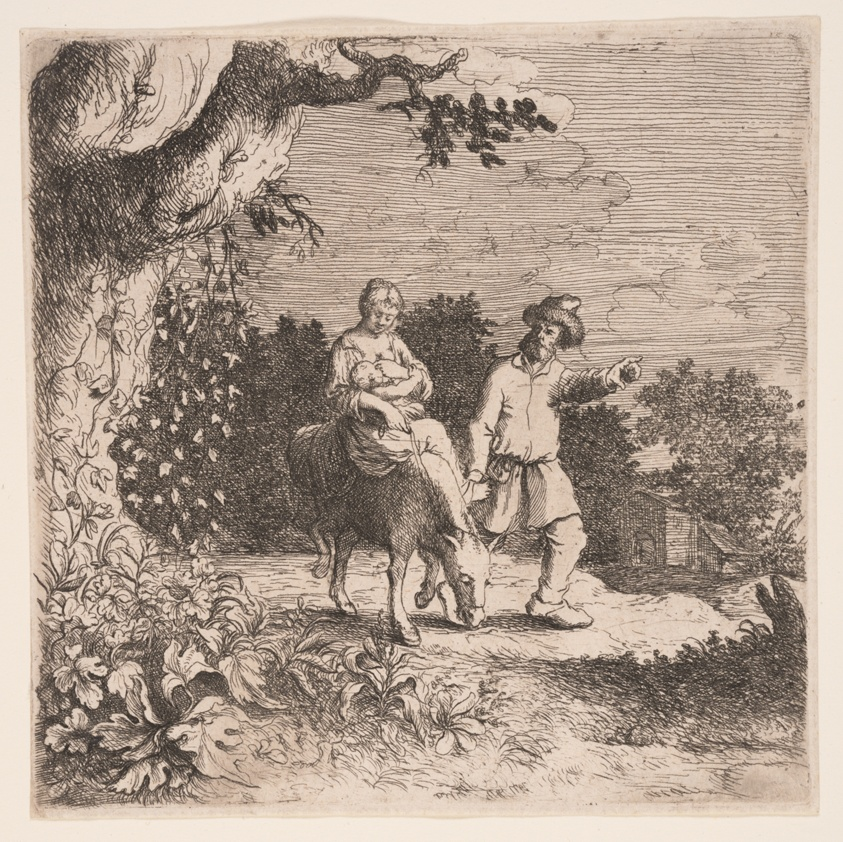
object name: Print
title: The Flight into Egypt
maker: Willem Basse (Dutch, 1613 or 1614–1672)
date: 1642/48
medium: Etching on paper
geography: Netherlands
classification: etching; paper; print; prints and drawing